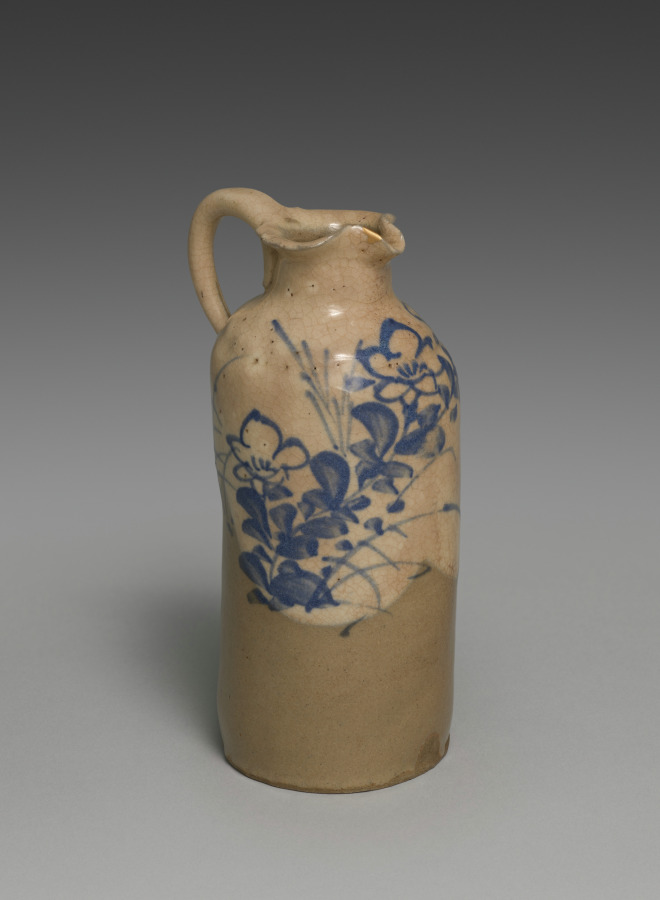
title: Sake Pourer with Bellflowers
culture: Japan, Edo period (1615–1868)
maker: attributed to Seifū Yohei I (Japanese, 1801–1861)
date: c. 1844–57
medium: one of a pair of sake flasks; stoneware with white slip, underglaze blue and gold repair (kintsugi) (Kyoto ware)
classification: Ceramic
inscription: The storage box for the pair of vessels is inscribed and impressed with seals.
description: This pair of sake pourers adorned with with bamboo and bellflowers is attributed to the founder of the Seifū Studio, Seifū Yohei I (1801–1861). Yohei I, the lineage founder, was born to the Yasuda family in the city of Kanazawa, which faces the Sea of Japan. His home province of Kaga (in present-day Ishikawa Prefecture) produced its own ceramics, known as Kutani ware, but for his training as a potter, Yohei I chose Kyoto, which produced the more technically advanced porcelain ware. He moved to Kyoto around the 1820s and became apprenticed to Nin’ami Dohachi, a leading potter in the city. He later struck out on his own, and it is likely that his teacher gave him the name Seifu Yohei. His works include many exquisitely painted copies of Chinese porcelain, and he also produced stoneware with overglaze color enamels that emulated works in the style of Ogata Kenzan (1663–1743) at which his teacher excelled.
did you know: Kintsugi is the Japanese art of repairing broken pottery by mending the areas of breakage with urushi lacquer dusted or mixed with powdered gold.